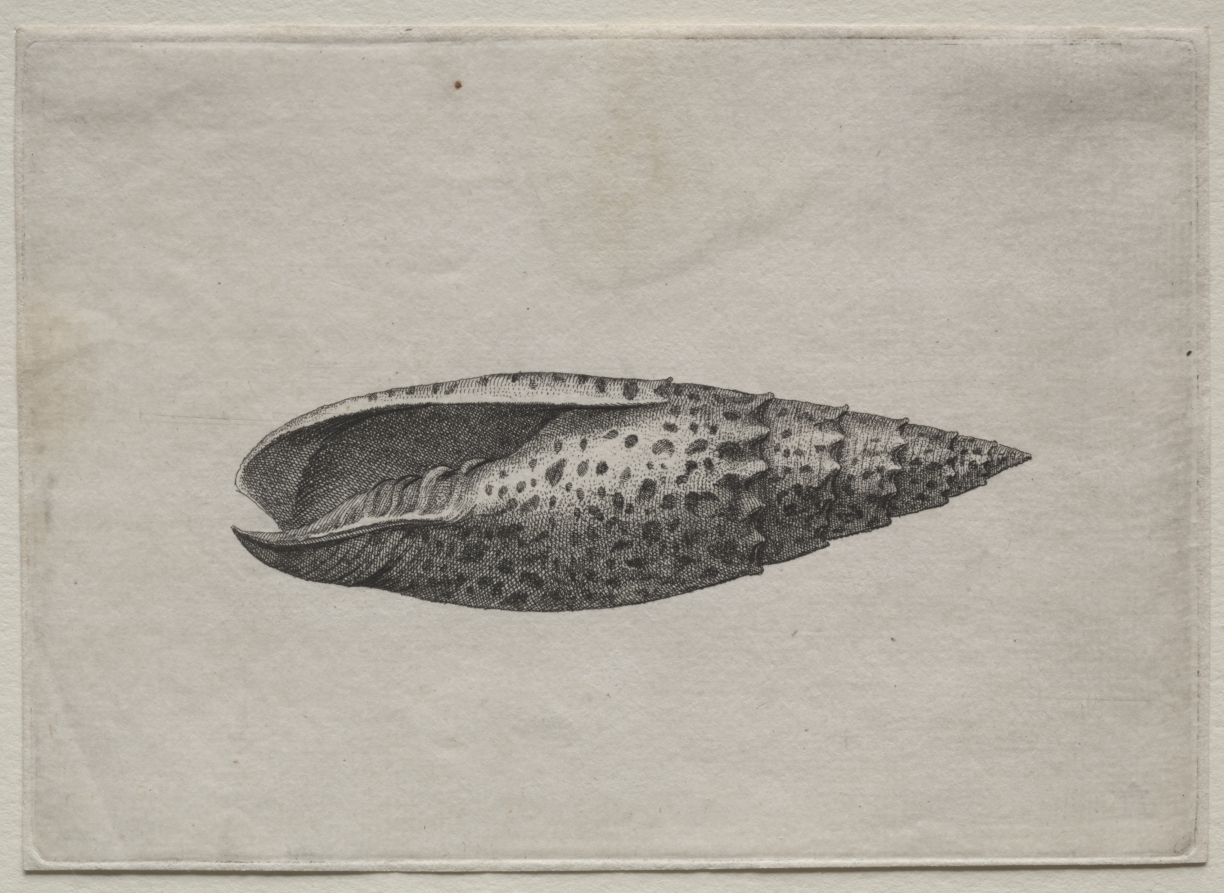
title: Shells: Mitra papalis L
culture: Bohemia, 17th century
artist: Wenceslaus Hollar (Bohemian, 1607–1677)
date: c. 1640s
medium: etching and engraving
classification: Print